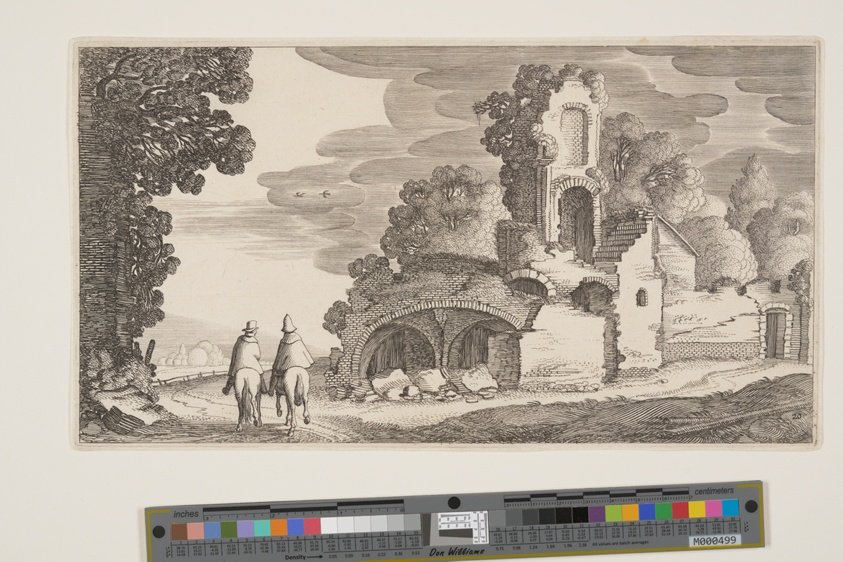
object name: Print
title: Ruins Along a Road, from Landscapes (Playsante Lantschappen)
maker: Attributed to Claes Jansz. Visscher II (Dutch, 1586-1652); after Jan van de Velde II (Dutch, c. 1593-1641)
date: c. 1641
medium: Etching, with engraving, on ivory laid paper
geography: Netherlands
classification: etching; paper; print; prints and drawing